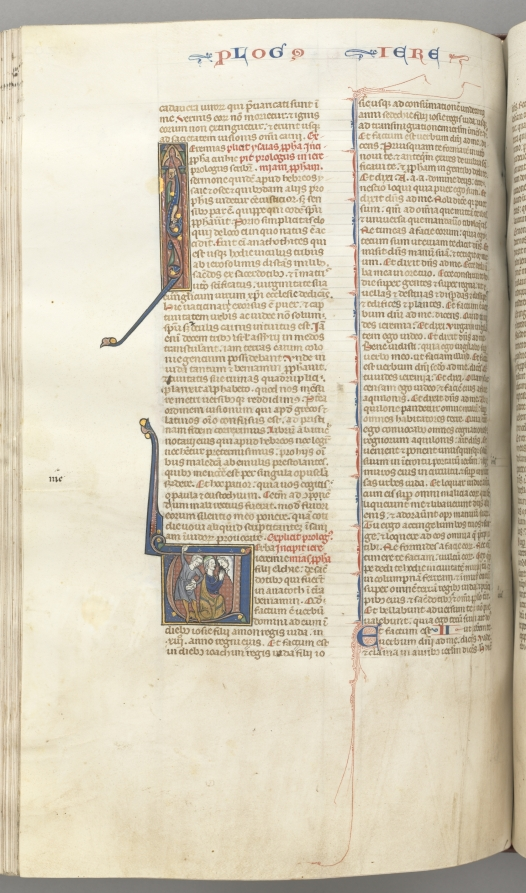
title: Fol. 292v, Jeremiah, historiated initial V, the stoning of Jeremiah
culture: Southern France, Toulouse(?), 13th century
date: c. 1275–1300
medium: ink, tempera and gold on vellum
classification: Bound Volume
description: Biblical manuscripts were highly prized and important possessions of churches, monasteries, cathedral schools, and universities throughout medieval Europe. The biblical texts were known as the vulgate, the translations made by Saint Jerome in the fourth century from Hebrew and Greek into Latin, which became the definitive and official Latin version of the Roman Church. In the 13th century, the bible was, for the first time, produced as a single volume with an officially sanctioned sequence to its books and chapters as illustrated by this example. The very extensive decoration of this bible is arranged hierarchically to indicate the relative importance of the various texts so that full or almost full-page initials mark the openings of the first prologue, Genesis, and the first Gospel; historiated initials mark the beginning of each book and illuminated initials mark the Prologues.